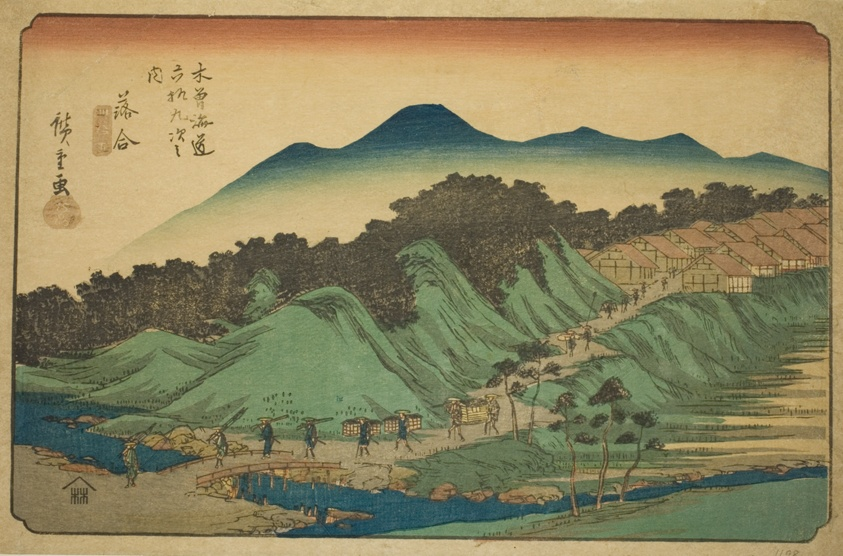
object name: Print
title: No. 45: Ochiai, from the series "Sixty-nine Stations of the Kisokaido (Kisokaido rokujukyu tsugi no uchi)"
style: Japanese (culture or style)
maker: Utagawa Hiroshige 歌川 広重; Japanese, 1797-1858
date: c. 1835/38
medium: Color woodblock print; oban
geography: Japan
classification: woodblock print; print; asian art